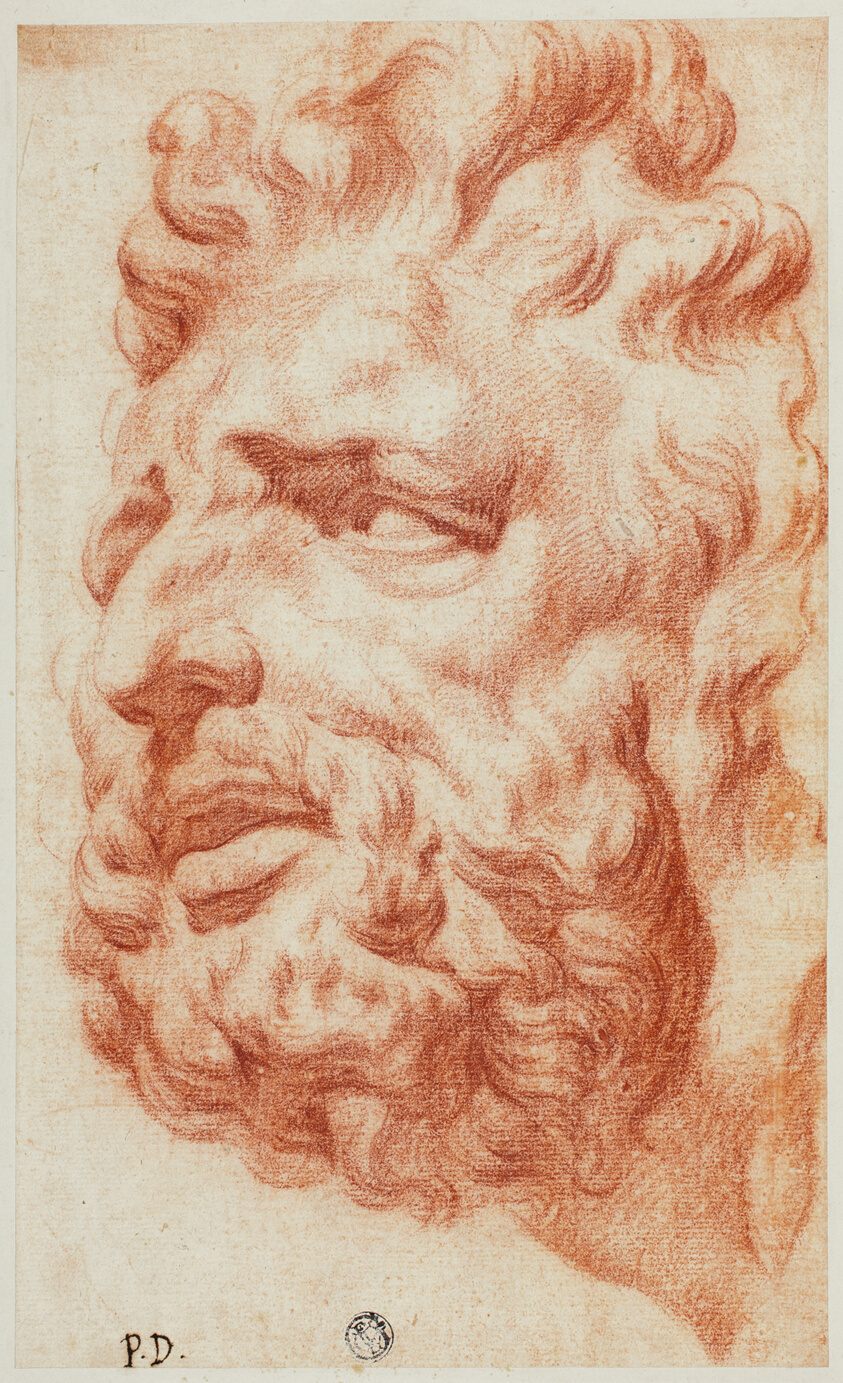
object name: Drawing and Watercolor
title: Head of Laocoon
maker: Pietro Dandini (Italian, 1646-1712)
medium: Red chalk on buff laid paper, laid down on ivory wove card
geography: Italy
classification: chalk; drawings (visual works); prints and drawing